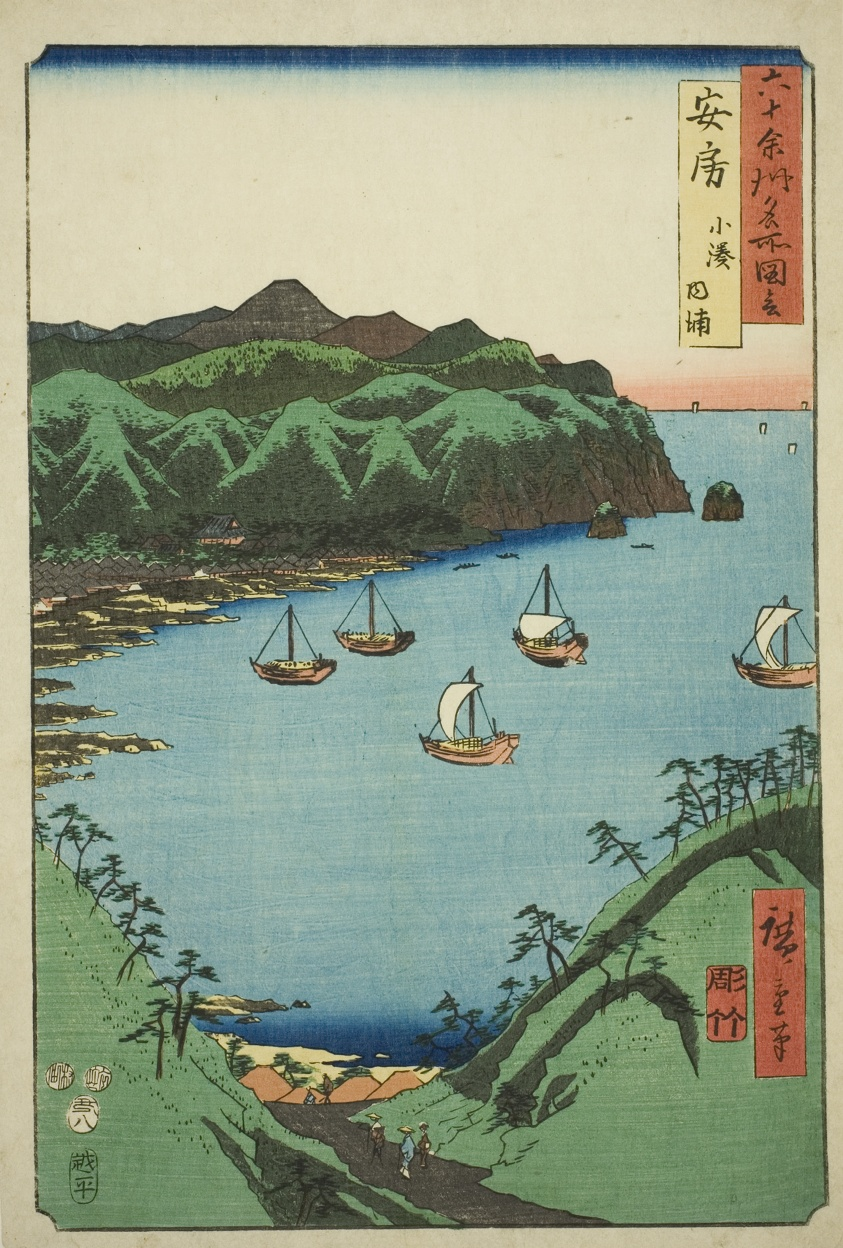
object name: Print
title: Awa Province: Inner Bay at Kominato (Awa, Kominato uchiura), from the series "Famous Places in the Sixty-odd Provinces (Rokujuyoshu meisho zue)"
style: Japanese (culture or style)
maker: Utagawa Hiroshige 歌川 広重; Japanese, 1797-1858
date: 1853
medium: Color woodblock print; oban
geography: Japan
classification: woodblock print; print; asian art